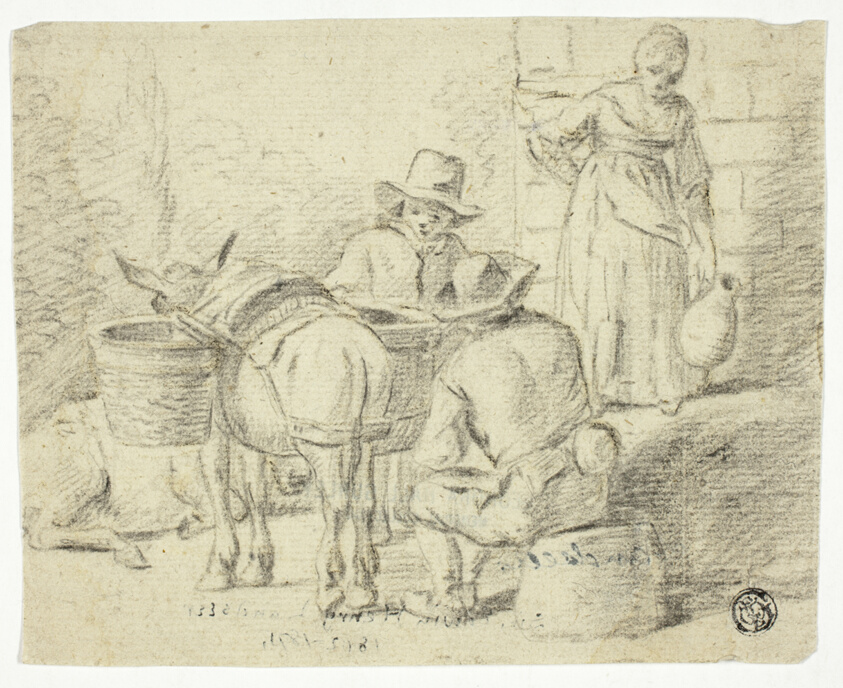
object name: Drawing and Watercolor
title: Men and Donkeys, Woman with Pitcher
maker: Edwin Henry Landseer (English, 1802-1873)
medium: Black chalk, with oiled charcoal, on cream laid paper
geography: England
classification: chalk; drawings (visual works); prints and drawing